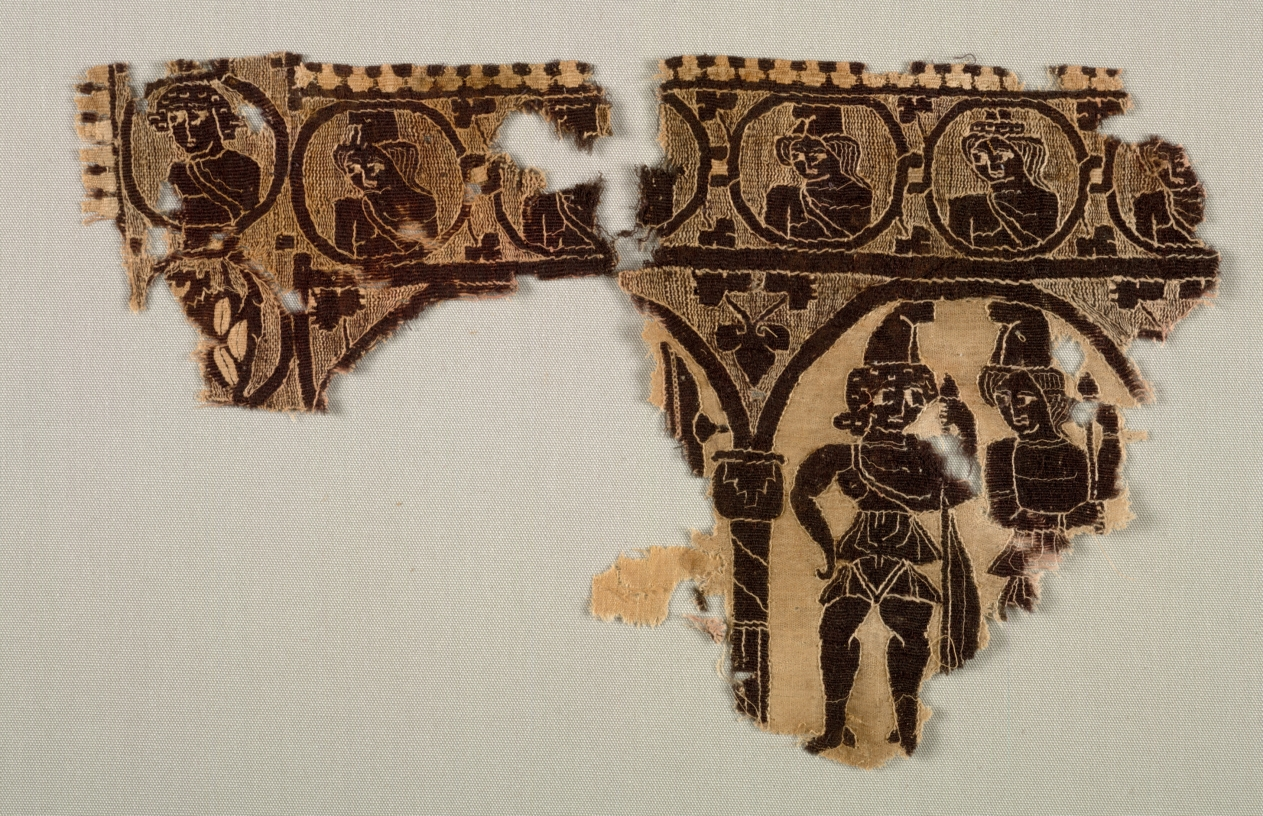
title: Neck Ornament of a Tunic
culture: Egypt, Byzantine period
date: 400s CE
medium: Undyed linen and dyed wool: tapestry weave with supplementary weft wrapping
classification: Textile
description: This was the front or back ornament of a unisex tunic neck opening made in linen. The border at the neck displays an interlacing vine scroll inscribing alternating male and female busts. Below it are two of the original three arches and one of the supporting columns with a stylized capital. The male figure on the left wears a short garment (chiton) draped over one shoulder and has a shield. He is accompanied by a figure on the right.